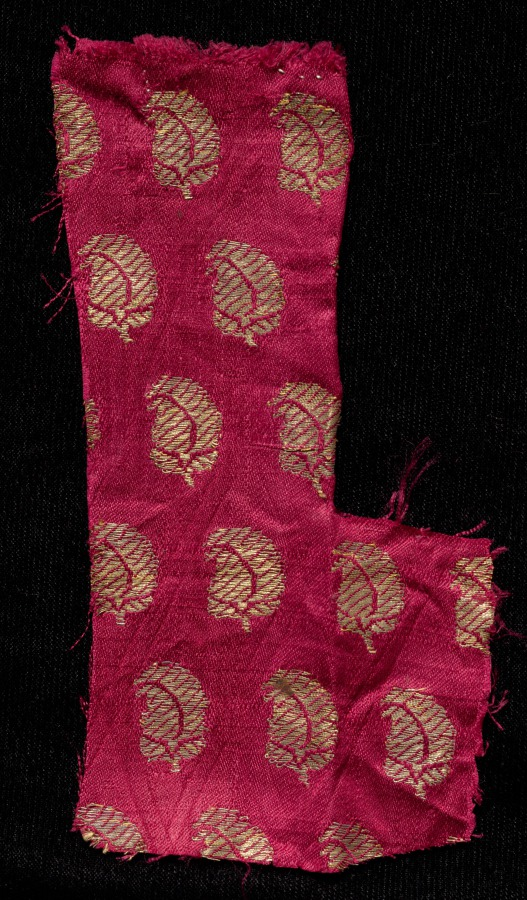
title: Fragment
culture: India, 19th century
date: 1800s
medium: brocade; silk and metal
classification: Textile